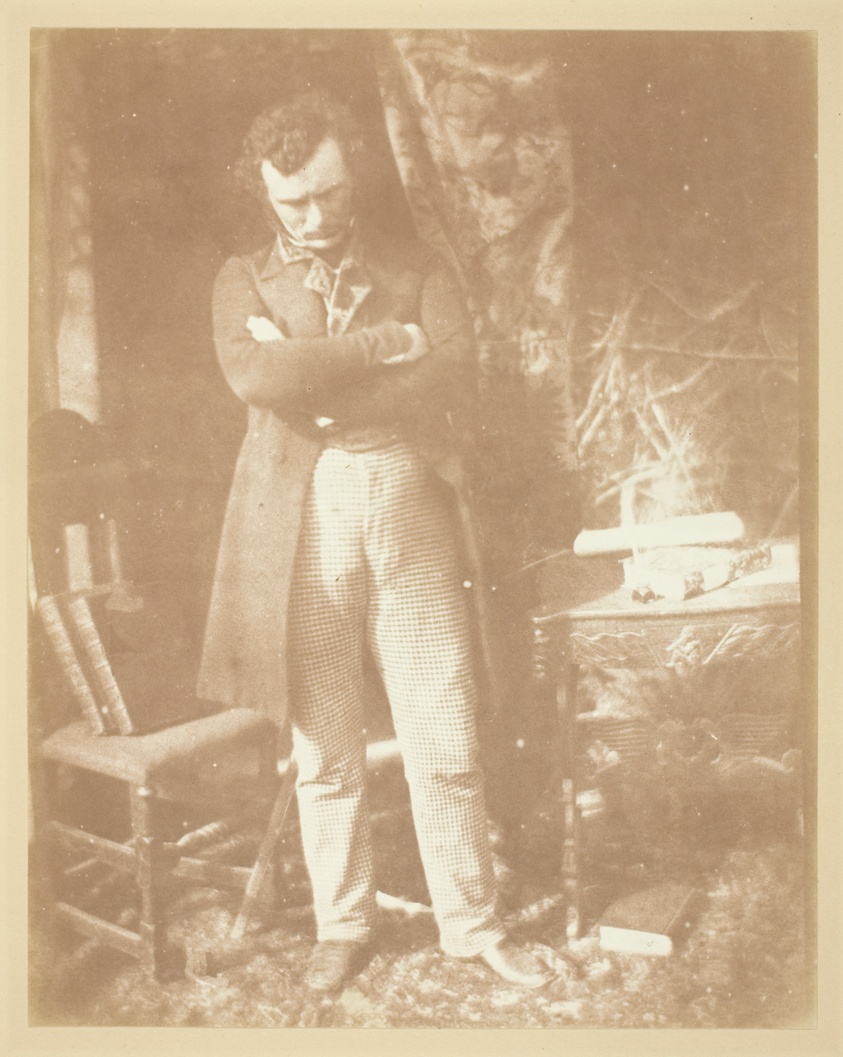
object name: Photograph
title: Mr. Robertson, Sub-Editor of "The Witness"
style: 19th century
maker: David Octavius Hill (Scottish, 1802–1870) and; Robert Adamson (Scottish, 1821–1848)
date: c. 1843/44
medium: Salted paper print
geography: Scotland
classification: salted paper print; photographic process; photography; photograph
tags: Collected by Hugh Edwards